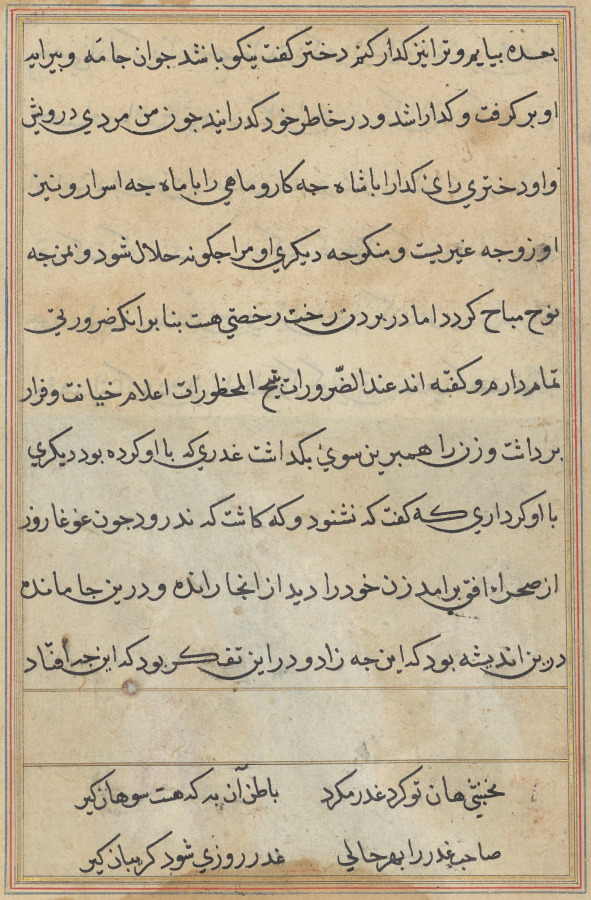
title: Page from Tales of a Parrot (Tuti-nama): text page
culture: Mughal India, court of Akbar (reigned 1556–1605)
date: c. 1560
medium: gum tempera, ink, and gold on paper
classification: Painting